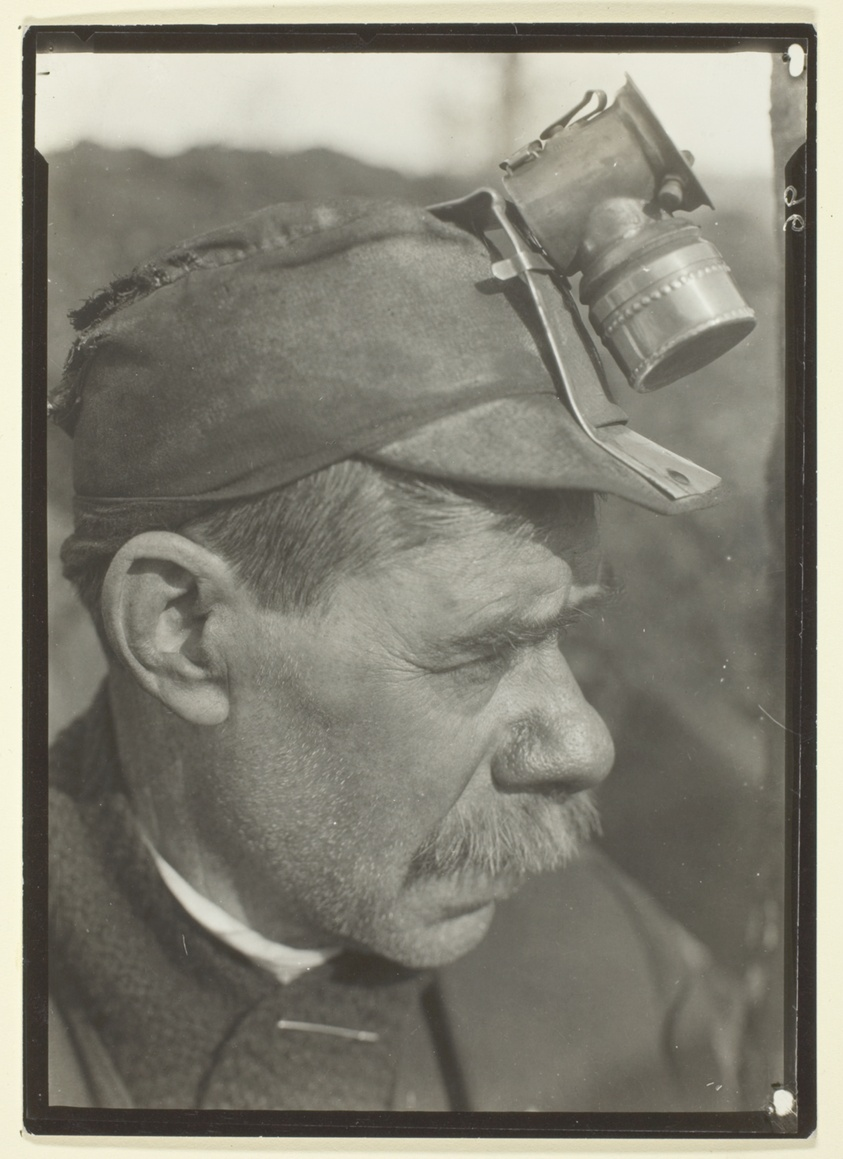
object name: Photograph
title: Slavic Foreman in Pennsylvania Coal Mine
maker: Lewis Wickes Hine (American, 1874–1940)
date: 1920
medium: Gelatin silver print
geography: United States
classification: gelatin silver (developing-out-paper) pr; photographic process; photography; photograph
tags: Collected by Hugh Edwards